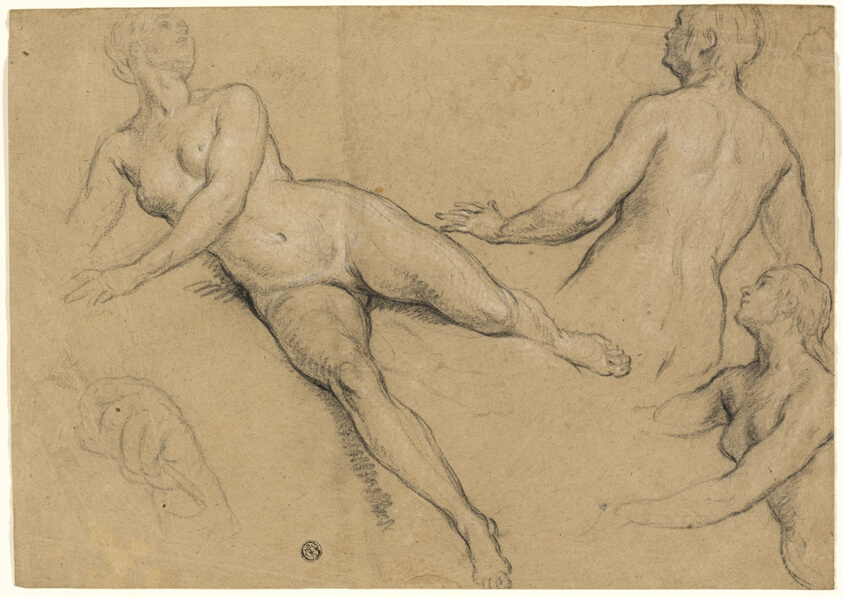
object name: Drawing and Watercolor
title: Sheet of Studies: Three Women and a Hand (recto); Sketches of Male Nudes, Heads and Hand (verso)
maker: François Marot (French, 1666-1719)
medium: Black chalk, heightened with white chalk (recto), and black chalk (verso), on tan laid paper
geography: France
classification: drawings (visual works); prints and drawing